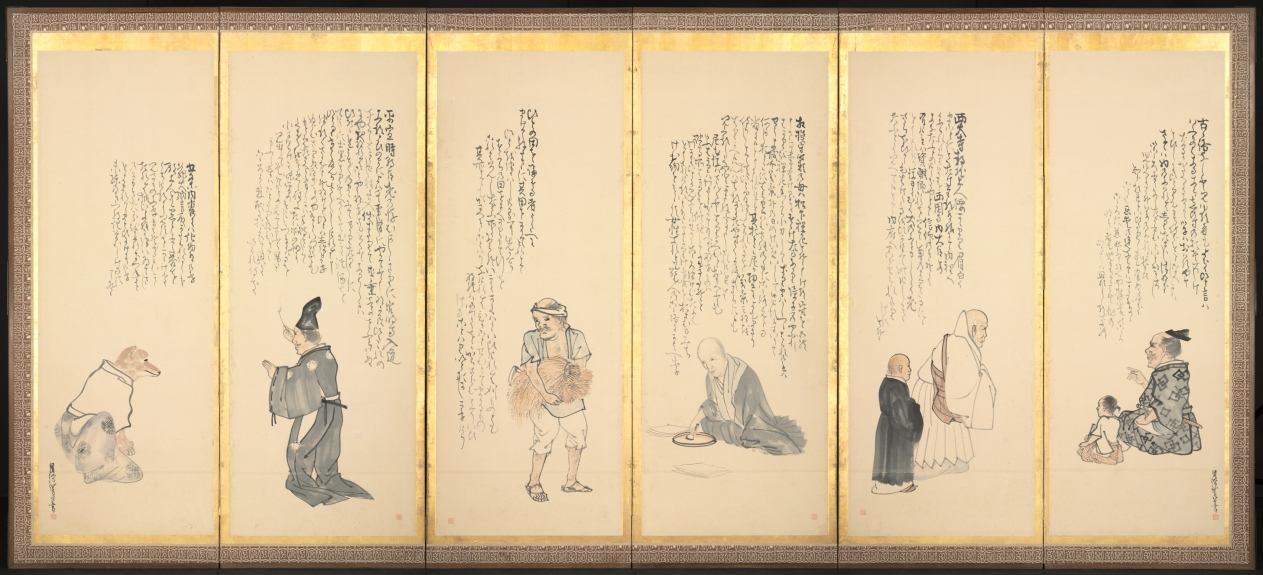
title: Scenes from Essays in Idleness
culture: Japan, Edo period (1615–1868)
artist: Matsumura Goshun (Japanese, 1752–1811)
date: late 1700s–early 1800s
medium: One of a pair of six-panel folding screens; ink and color on paper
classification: Painting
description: Matsumura Goshun inscribed passages from Buddhist monk Yoshida Kenkō’s (1283–1350) well-known collection of anecdotes, Essays in Idleness, across the top of the panels of this screen and its pair. Goshun illustrated the narratives with his vision of the figures who feature in them. The texts cascade down from right to left, forming unique compositional relationships with the images below. The episodes offer a veritable portrait of human idiosyncrasy, from one man’s deep faith in radishes to another’s inability to avoid nicknames.